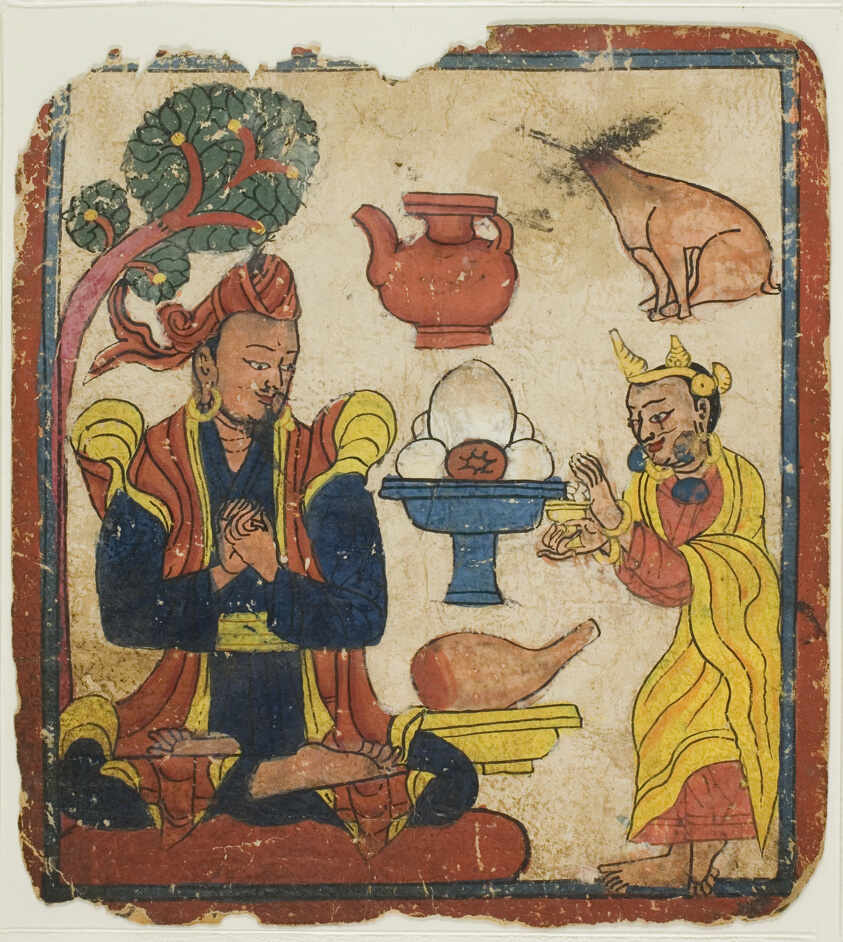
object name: Religious/Ritual Object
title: King Mangkur Nourished by Queen Devika, from a Set of Initiation Cards (Tsakali)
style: Himalayan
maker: Southern Tibet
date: 14th/15th century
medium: Ink and watercolor on paper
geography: Tibet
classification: miniature painting; painting; asian art; ritual objects